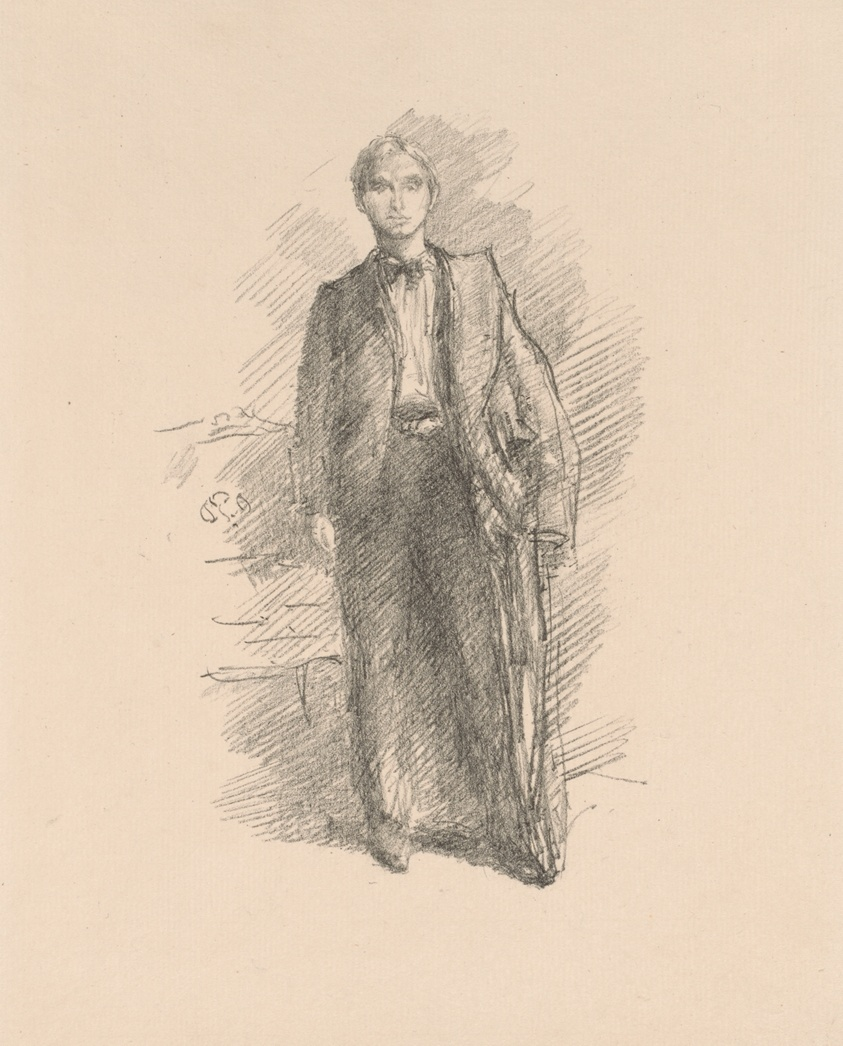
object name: Print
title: Portrait Study: Mr. Herbert C. Pollitt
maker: James McNeill Whistler (American, 1834-1903)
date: 1896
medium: Transfer lithograph, with scraping in black on cream laid paper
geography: United States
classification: transfer lithograph; lithograph; print; prints and drawing; paper